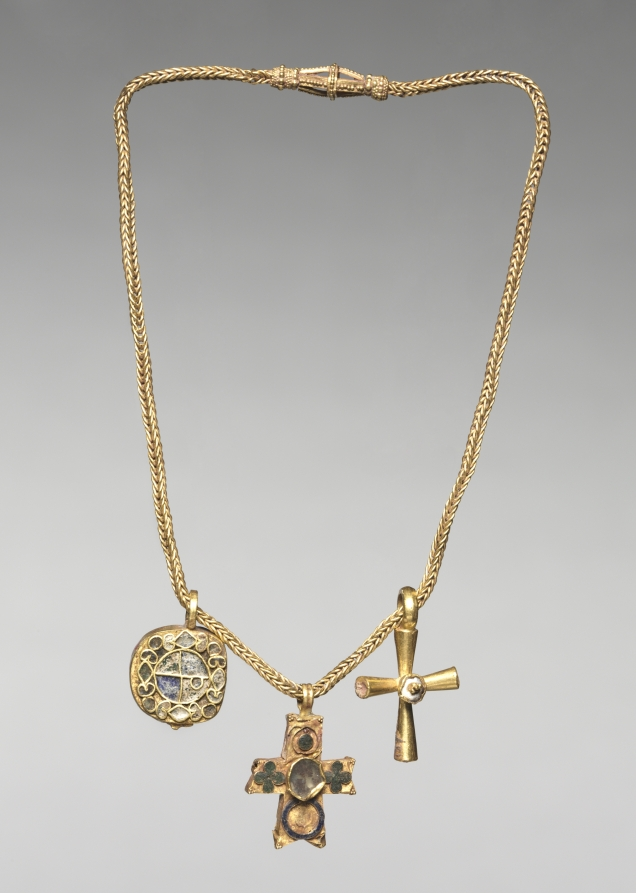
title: Chain with Pendant and Two Crosses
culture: Byzantium, Syria(?), Byzantine period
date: early 500s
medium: gold with enamel and glass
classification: Jewelry